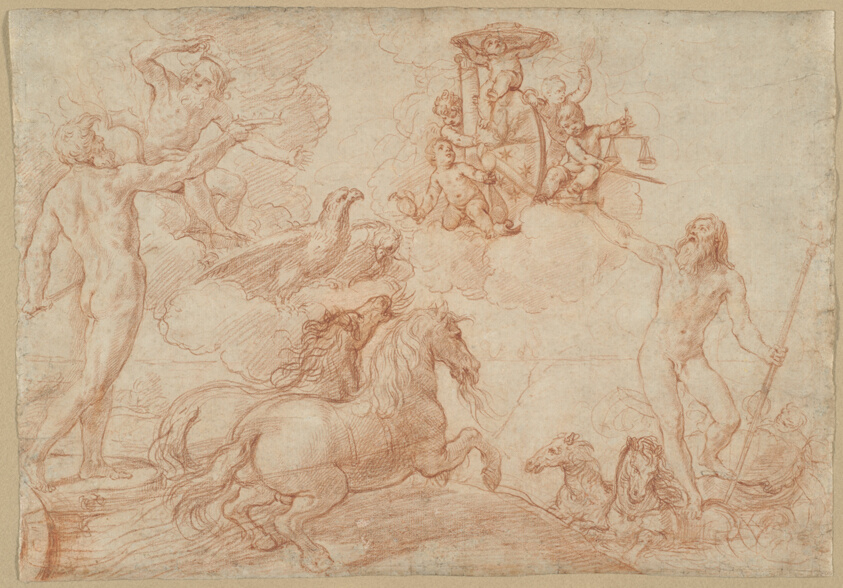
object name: Drawing and Watercolor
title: Jupiter, Neptune and Pluto Paying Homage to the Coat of Arms of Cardinal Borghese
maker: Simone Cantarini (Italian, 1612-1648)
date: early 1640s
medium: Red chalk, with touches of stumping, on cream laid paper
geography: Italy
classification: drawings (visual works); paper; chalk; prints and drawing